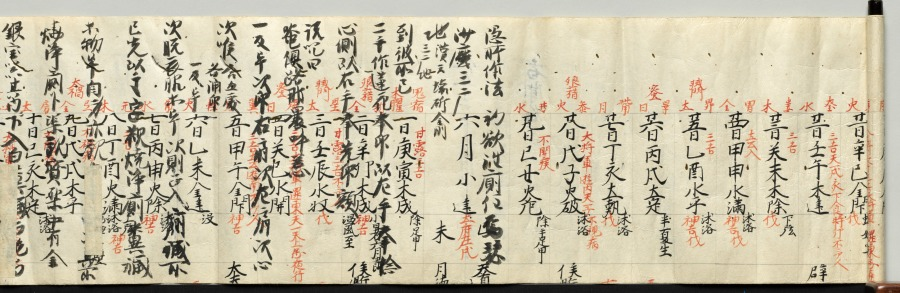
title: Scroll of Miscellaneous Notes written on a Calendar by Priest Seigen (verso)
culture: Japan, Kamakura period (1185–1333)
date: c. 1200–1231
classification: Manuscript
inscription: bears miscellaneous notes written by Priest Seigen.